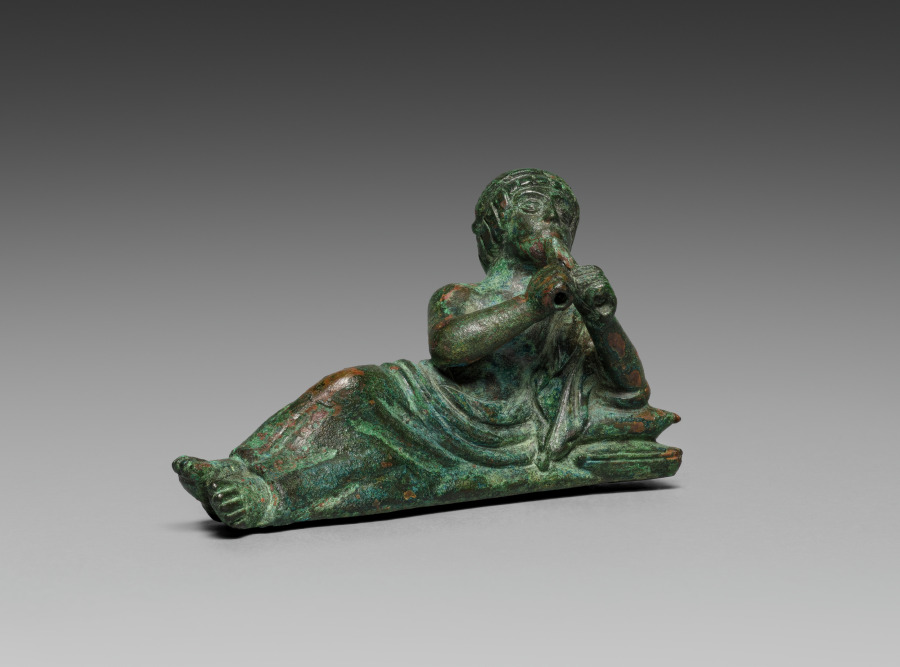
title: Vessel Ornament of Reclining Pipes Player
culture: Etruscan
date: probably 400–375 BCE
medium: bronze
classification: Sculpture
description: This bronze banqueter figurine was one of six once adorning the rim of a large basin, now lost. Cast in molds with individualized details, most have grooves on their underside to attach to the basin. Minute traces of gilding remain on areas of clothing and skin (mostly visible only under magnification), suggesting that they may have been completely gilded. Two handles in the form of hippocampi, horses with serpentine tails, also belonged to the basin and are now displayed at the Michael C. Carlos Museum at Emory University. The basin may have been used to hold liquid for a banquet, or was perhaps funerary. This bronze reclining figurine raises his head and blows into a set of pipes. The tips of the pipes are broken off. Some gilding remains on the mouth and chin. The figurine wears a himation over his body and has a bare chest. Two pillows prop up his left elbow. His hair falls over his forehead in square bangs.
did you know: Guests were often invited to play instruments and sing during symposia.